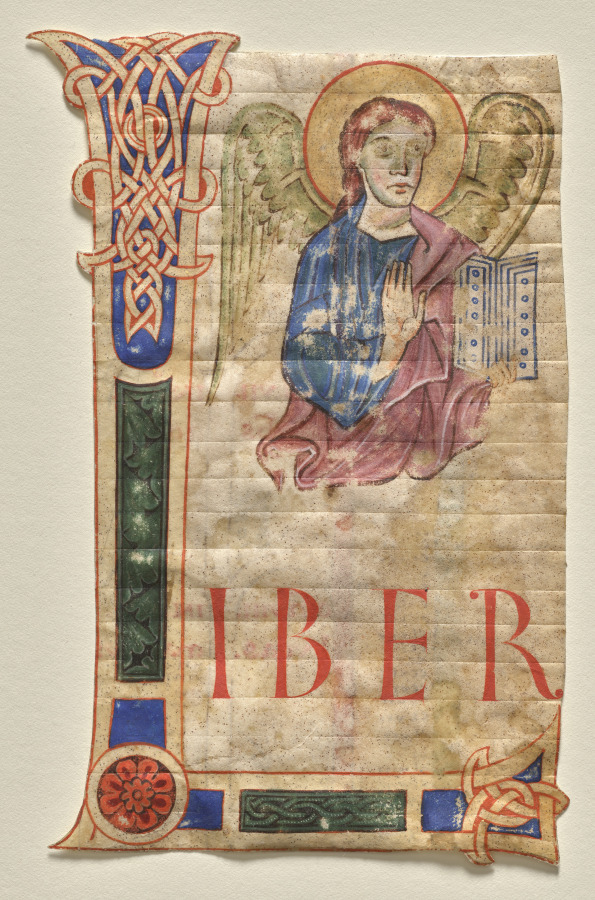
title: Miniature Excised from a Gospel Book with Initial L[iber generationis]: The Symbol of St. Matthew (recto)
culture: Italy, Florence, 12th century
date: c. 1125–1150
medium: ink and tempera on vellum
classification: Manuscript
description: This initial L, for Liber generationis... (The book of the generation of Jesus Christ...), originally served as an introduction to the Gospel of St. Matthew. Unlike the Helmarshausen illuminator, who painted an actual portrait bust of St. Matthew (displayed nearby), this artist chose to paint within the letter the Evangelist's symbol, a winged man holding a book.